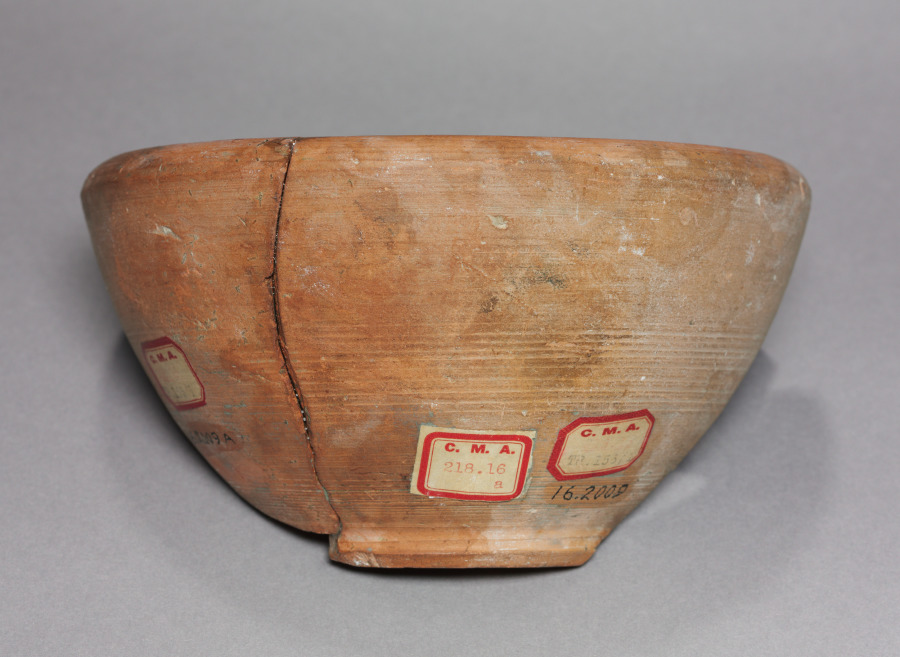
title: Fragment of a Mold for Arretine Bowl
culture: Italy, Roman, Augustan period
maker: M. Perennius (Roman, c. 100 BCE–100 CE)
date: 27 BCE–14 CE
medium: terracotta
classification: Ceramic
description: Preserving nearly half of a mold for a relief-decorated terracotta bowl, these joining fragments show women and youths reclining at a symposium. On one side, a woman passes a bowl or cup to a youth, whom another youth reaches over to crown with a garland or wreath. A third youth reclines beside them, and a second woman sits on the next couch, looking away and holding a lyre on her raised knee. Above, within a stamped rectangle, appears the signature M. PERENN | TIGAANI.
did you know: This mold includes an artist signature, reversed to appear properly in the final product.